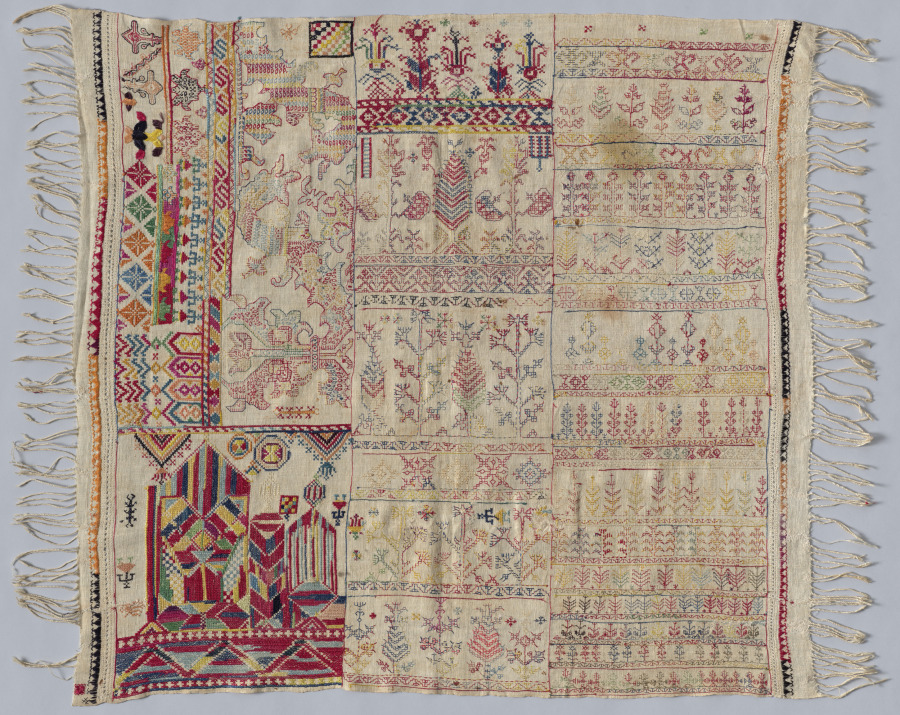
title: Embroidery sampler (chelliga/shelliga)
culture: Africa, North Africa, Morocco, Salé, Moroccan embroiderer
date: 1800s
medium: Cotton, silk, dye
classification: Sampler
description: These detailed samplers demonstrate the artist's technical range. Here, floral designs, protective open-palm hand motifs (khamsa) and various patterns are embroidered using double-running stitches, straight stitches, and long-armed cross stitches with dyed silk thread. Young women from all social classes would learn these skills from a master craftswoman (mu’allima), who taught within her home. Upon the completion their studies, these professionally trained women would produce a sampler as a “diploma” testifying to their skills.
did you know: This sampler's motifs include human figures, floral motifs, doorways, and “resha” starlike motifs. It is unusual for samplers to have a fringe border.